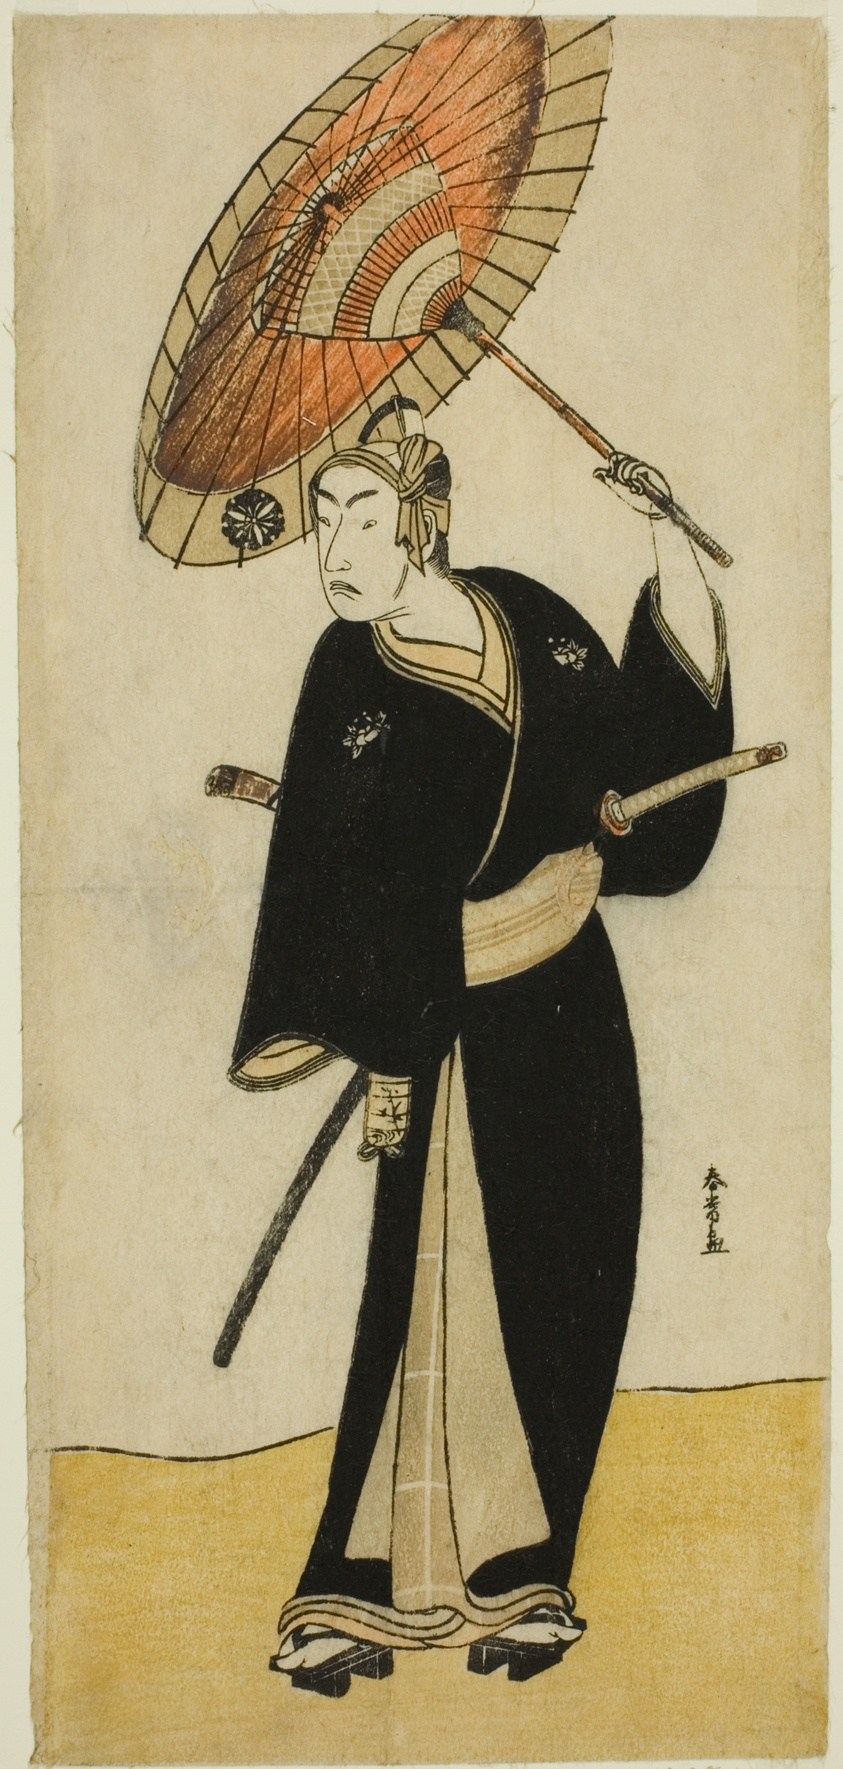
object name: Print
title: The Actor Matsumoto Koshiro IV as Sukeroku in the Play Sukeroku Yukari no Edo-zakura, Performed at the Ichimura Theater in the Sixth Month, 1782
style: Japanese (culture or style)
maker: Katsukawa Shunjo; Japanese, died 1787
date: c. 1782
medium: Color woodblock print; hosoban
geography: Japan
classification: woodblock print; print; asian art